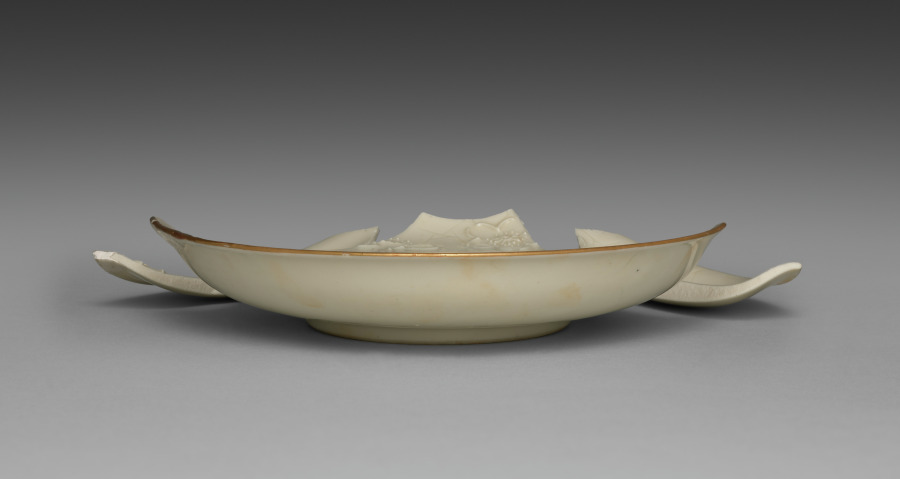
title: Medium-sized Dish from Dining Set with Plum Blossoms and Cracked-Ice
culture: Japan, Meiji period (1868–1912)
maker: Seifū Yohei II (Japanese, 1844–1878)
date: c. 1875–78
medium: Porcelain with molded designs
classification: Ceramic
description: Each item in this set has a delicate low-relief design of flowering plum branches over scattered, intersecting lines meant to resemble the cracked-ice surface of a frozen body of water and is signed on the base in gold pigment. While Yohei II produced many fine works in underglaze blue, like those produced by Kiyomizu Shichibei, he also made works in quite different styles later in his career, from the early 1870 s. In 1873, he was appointed purveyor to the Industrial Center of Kyoto Prefecture, a designation associated with Kyoto’s efforts to reach an international market through the port of Kobe; and from 1875 until his death, he was involved in national-level projects to present Japanese ceramics across the world. It was during this period that Yohei III was apprenticed to Yohei II, and it has been suggested that this set may in fact be an early example of Yohei III’s work, which he signed with his teacher’s name. Decorated with flowers resembling Japanese textile motifs, the set calls to mind the design of Yohei II’s pair of vases with plum blossoms in the Victoria and Albert Museum. Here, the elaborate trees created for a formal public exhibition setting have been translated into the approachable blossoms of the genteel domestic environment. While the designs are consistent across the pieces, each raised flower petal and pistil and each incised line in the ice was done by hand, so the cups, bowls, and dishes are similar yet unique. The bottoms of two boxes once identified the set’s owner, but the information has been deliberately obscured with black ink. However, inscriptions still visible appear to indicate two occasions, once at the end of July 1886 , and once again in June 1916 , when parts of the set were requested from Hokura in Niigata Prefecture. The location corresponds to a neighborhood in the present-day city of Jōetsu. The surname Tsuji 辻 also appears on a paper tag affixed to one of the box cloths. Future research may possibly reveal more about their provenance. A vase by Yohei III in a private collection combines the formal grandeur of the Yohei II vases in the Victoria and Albert Museum with the gentler design of this dining set, placing flowering plum trees against soft, scalloped-edge clouds resembling those in golden screens.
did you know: The dining wares have a creamy white coloration that the four boxes containing them identify as Korean in style.